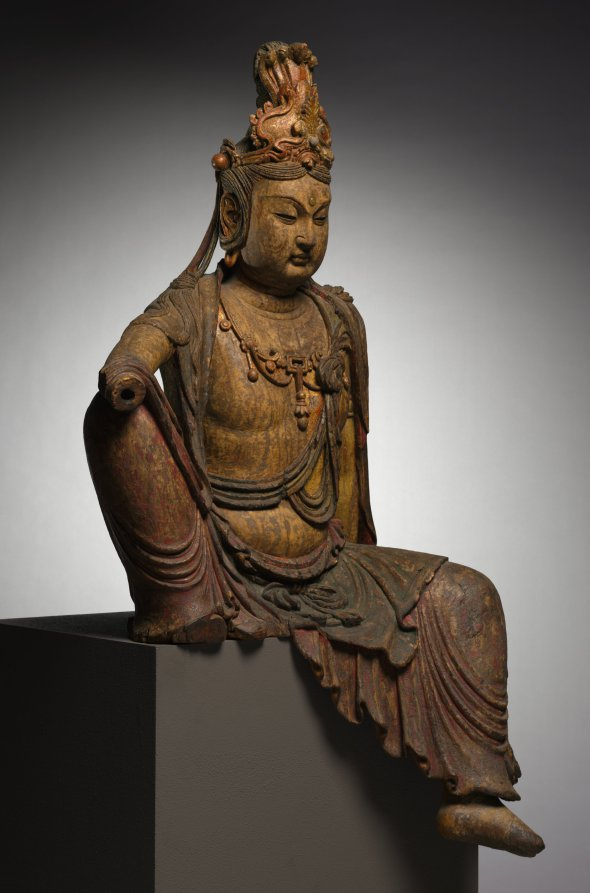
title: Seated Guanyin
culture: China, late Northern Song dynasty (960-1127) - Jin dynasty (1115-1234)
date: late 1100s–1200s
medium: wood with polychromy and gilding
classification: Sculpture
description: The South Sea Guanyin was originally seated on a rocky throne to represent the shore of his home in the mythical island of Potala. His right leg is raised, the arm resting on the folded knee in a relaxed position. With an expression of grace, calmness, and compassion, the Guanyin is especially appealing as the "guide of souls" who offers hope for salvation.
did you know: After acquisition, the CMA conservator meticulously used surgical knives and etching tools to uncover the sculpture's original polychromy and gilding, hidden beneath layers of protective varnish and paint.